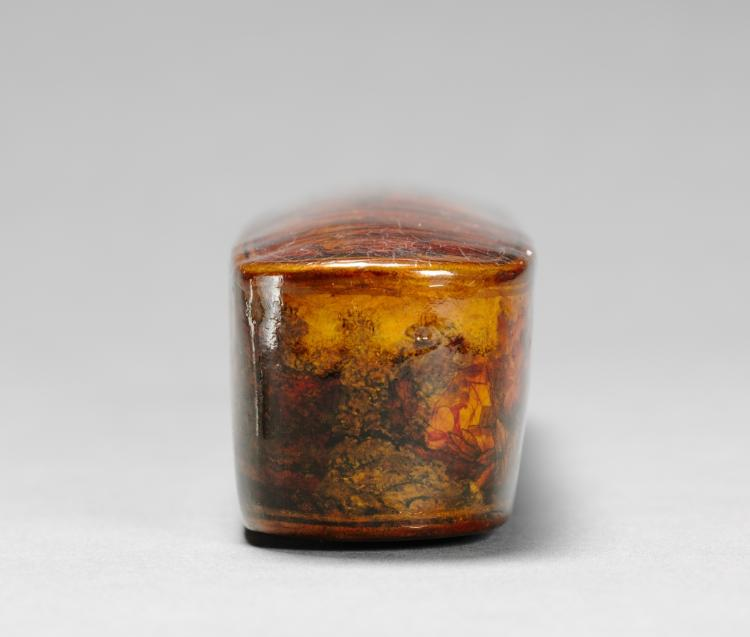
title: Pen and Ink Box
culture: Iran, probably Isfahan, Safavid period (1501–1722)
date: 1667–98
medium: Varnished lacquer and opaque watercolor over papier-mâché, ink, and copper alloy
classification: Lacquer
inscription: 1109